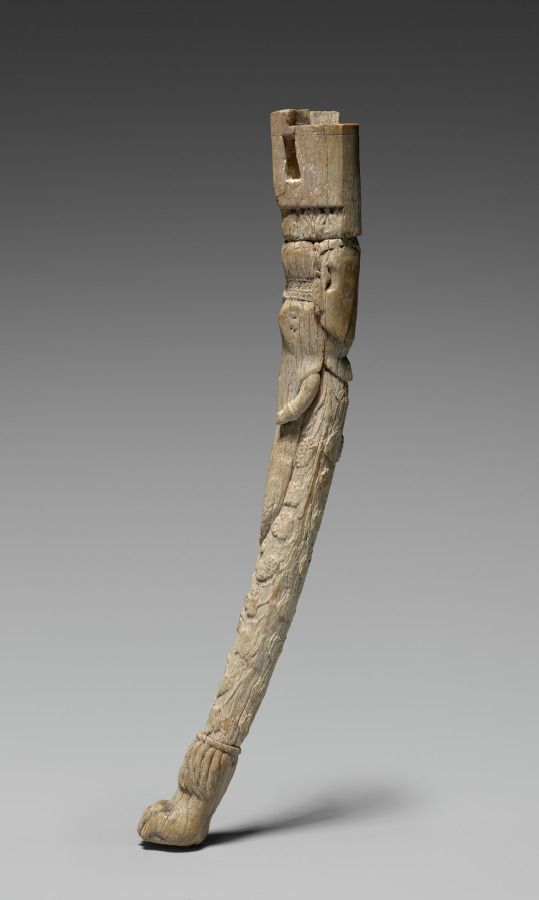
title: Chair Leg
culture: Afghanistan, Begram, Kushan period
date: 300s CE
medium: ivory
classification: Ivory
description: This ivory carving was made to sheath wooden furniture made in India for trade along the Silk Road, which stretched from Rome to China. Indian ivory-faced furnishings--along with lacquer boxes from China and painted glass from Rome--were found in an extraordinary deposit of luxury goods at a site called Begram. The wood on which the ivory and lacquer were affixed has long disintegrated, and only the small pieces remain.